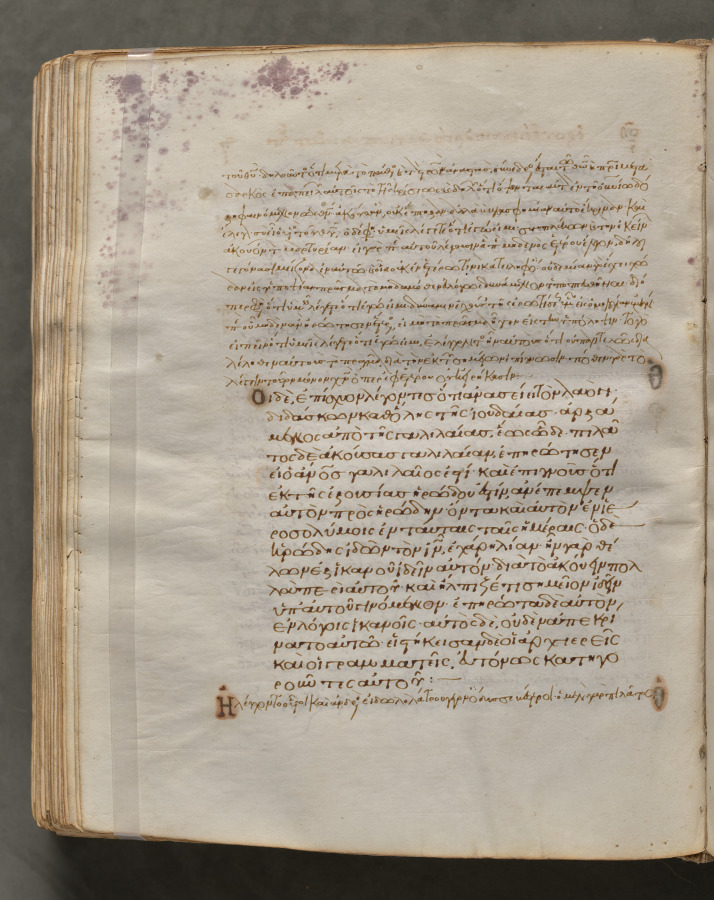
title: Text, folio 313 (verso), from a Gospel Book with Commentaries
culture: Byzantium, Constantinople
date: c. 1000–1100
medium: ink, tempera, and gold on vellum; leather binding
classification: Bound Volume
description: Each of the four gospels in this book opens on a page with brilliantly illuminated borders depicting the author of the text as well as birds—principally peacocks, symbols of the immortality of the soul—and fountains, representing the fountain of life and the salvation of the soul. This volume consists of 428 leaves with texts in Greek. Its level of sophistication suggests that it was probably written and decorated in a monastery in Constantinople.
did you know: Gospel books were carried in procession through Byzantine churches.